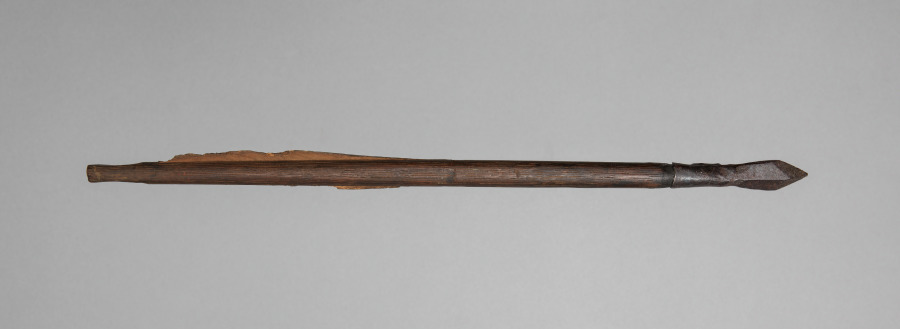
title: Crossbow Bolt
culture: Germany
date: 1500s-1600s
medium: wood, leather, steel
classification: Arms and Armor